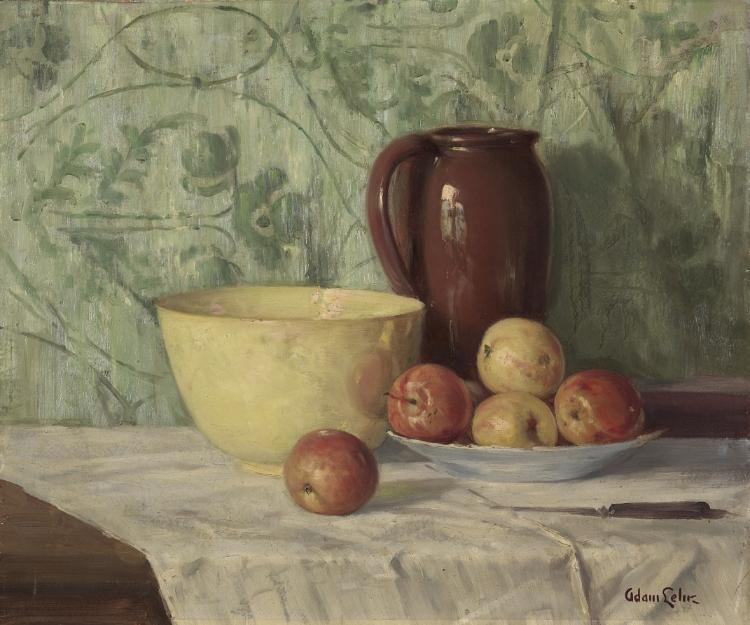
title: Still Life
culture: America, Ohio, Cleveland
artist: Adam Lehr (American, 1853–1924)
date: 1923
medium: oil on canvas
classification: Painting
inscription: signed lower right: Adam Lehr.